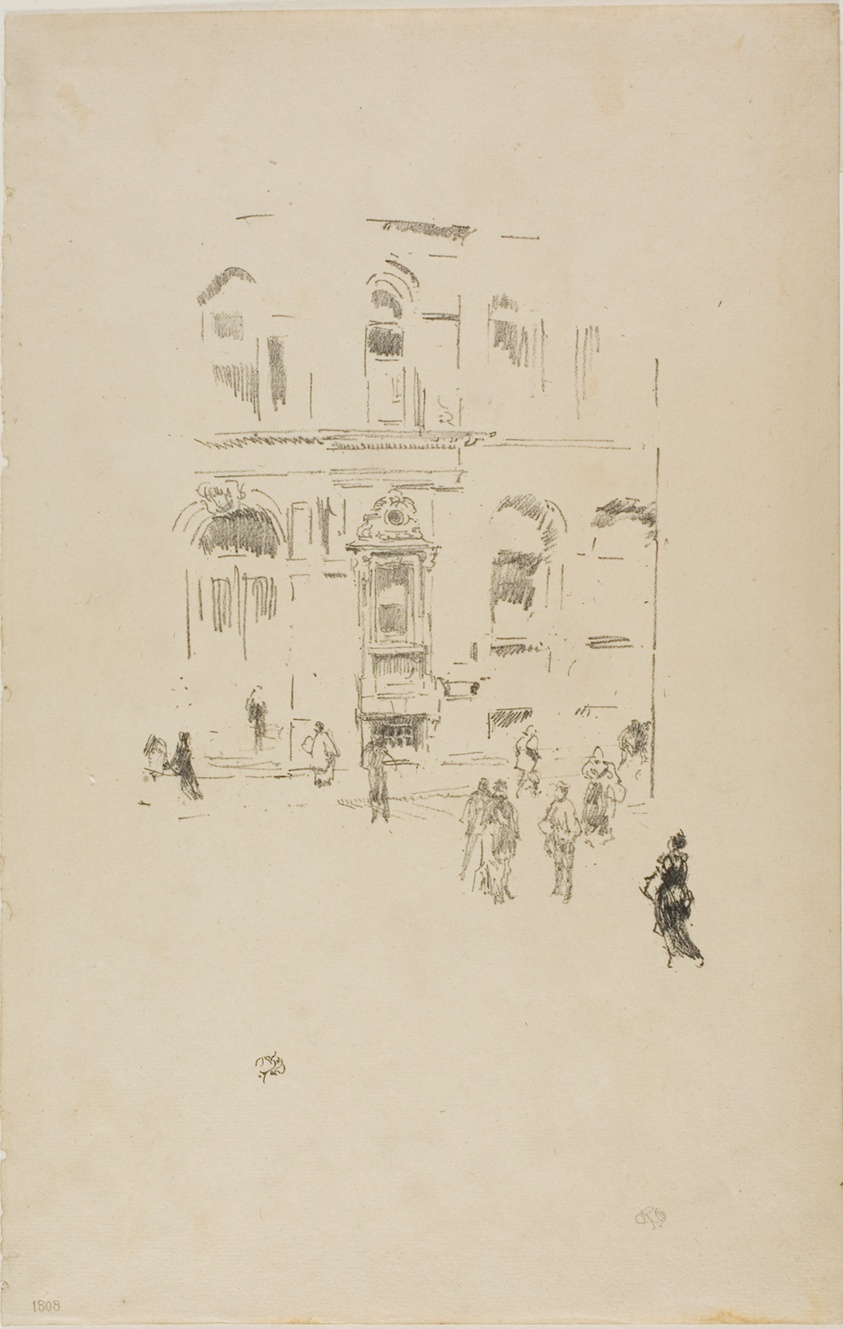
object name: Print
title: Victoria Club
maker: James McNeill Whistler (American, 1834-1903)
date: 1879/87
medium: Transfer lithograph in black ink with scraping, on ivory laid paper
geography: United States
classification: transfer lithograph; lithograph; print; prints and drawing; paper